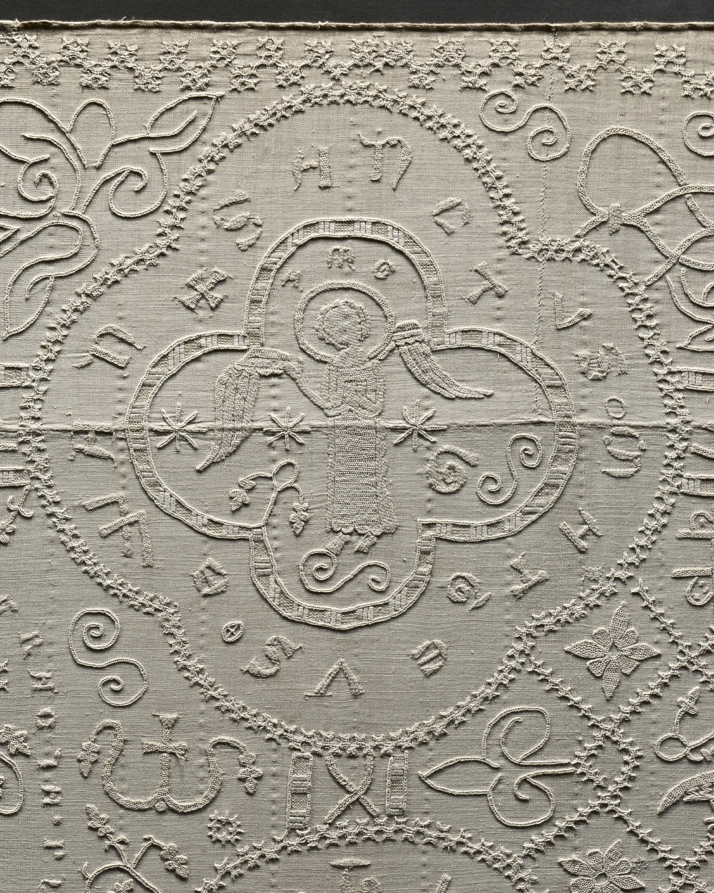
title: Altar Cloth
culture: Germany, Altenberg on the Lahn, Premonstratensian Convent, 14th century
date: c. 1350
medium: embroidery: linen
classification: Embroidery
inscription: various motifs enclosed in quatrefoils with identifying inscriptions in Gothic letters.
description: This large, embroidered altar cloth is one of the rarest, most important medieval church furnishings in existence. It was stitched by nuns in the Premonstratensian Convent in Altenberg on the Lahn River, north of Frankfurt, Germany, and was used to cover the church’s high altar in the weeks leading up to Easter. The cloth is an example of linen embroidery, a specialty of German nuns in the later Middle Ages. The Altenberg monastery church once had valuable furnishings; the high altar retable (a decorated frame with sculptures and paintings on the top of an altar) has survived, the main parts of which are now in the Städel Museum in Frankfurt, Germany.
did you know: When lit from behind, the previously hidden details emerge and the complex design becomes evident.